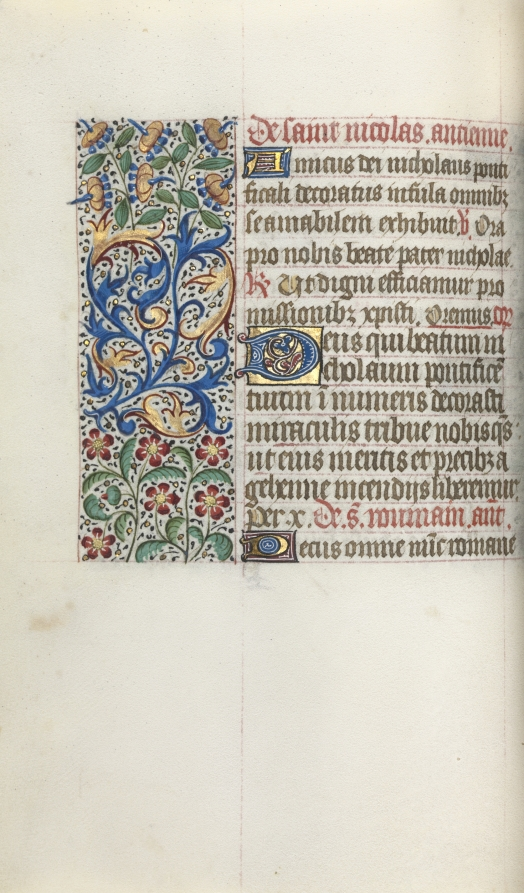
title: Book of Hours (Use of Rouen): fol. 52v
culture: France, Rouen, 15th century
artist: Master of the Geneva Latini (French, active Rouen, 1460–80)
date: c. 1470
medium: ink, tempera, and gold on vellum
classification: Bound Volume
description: In the late 1400s and early 1500s Rouen was an established and important center of book production. The city’s cathedral had a wealthy chapter that spent large sums of money to commission books and to maintain its extensive library. The stationers and booksellers would have likely been concentrated in or near the cathedral precinct. This artist, named after a manuscript now in Geneva, was Rouen’s principal illuminator during the second half of the 1400s.